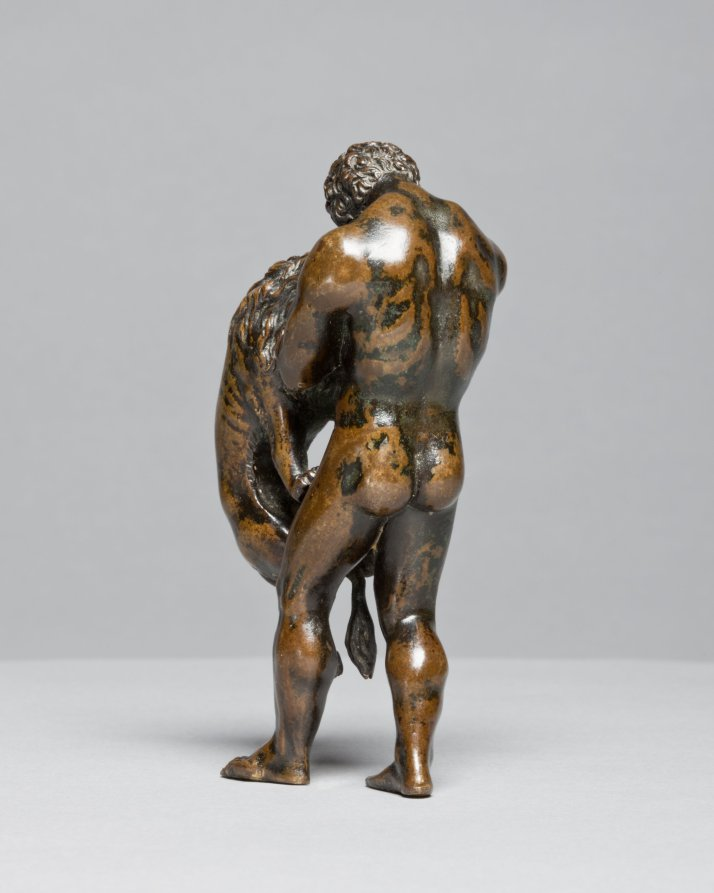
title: Hercules and the Nemean Lion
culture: Italy or France, 16th century or later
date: 1500s or later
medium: bronze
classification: Sculpture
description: The original owner of this work would have understood that this scene referred to the entire story of Hercules, the demi-god who had to accomplish twelve labors. The lion is named after the city of Nemea, near Corinth, a monstrous beast sent by the goddess Hera to wreak havoc on the area. After killing the lion, Hercules wore his pelt, commonly seen in other representations of the hero.